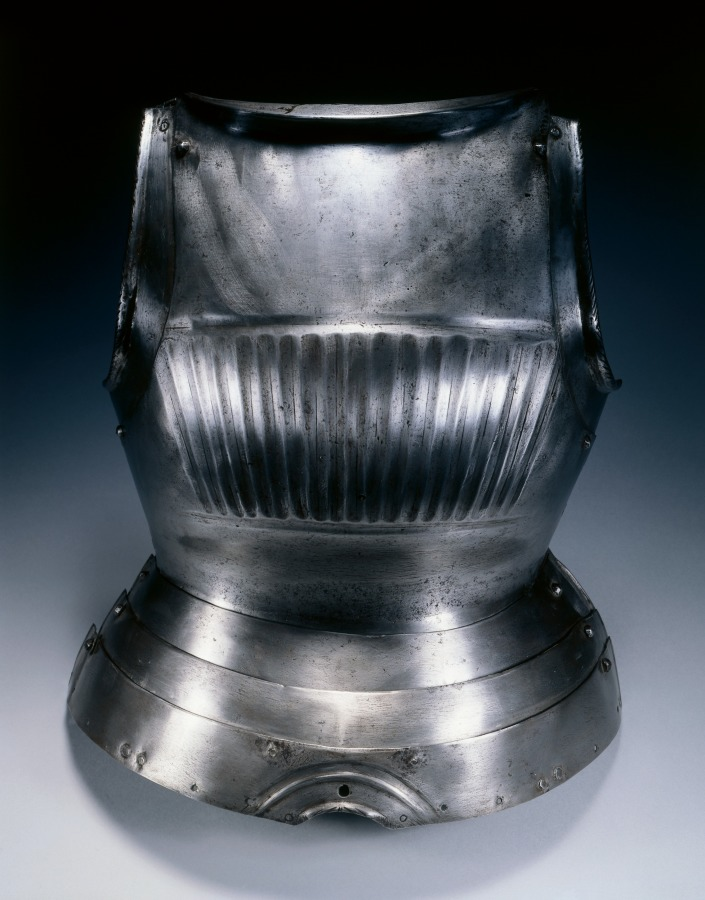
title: Breast and Backplates from a Maximilian Armor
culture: Germany, Nuremberg(?), early 16th century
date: c.1510–30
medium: steel, brass rivets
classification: Arms and Armor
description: Distinguished by its regularly fluted surfaces, armor in this style was popularized in South Germany during the early 1500s. The style is usually called "Maximilian," as it was introduced during the reign of Emperor Maximilian I (1493–1519). The style reflects male costume of the period and the shift to the new rounded forms of the Renaissance.